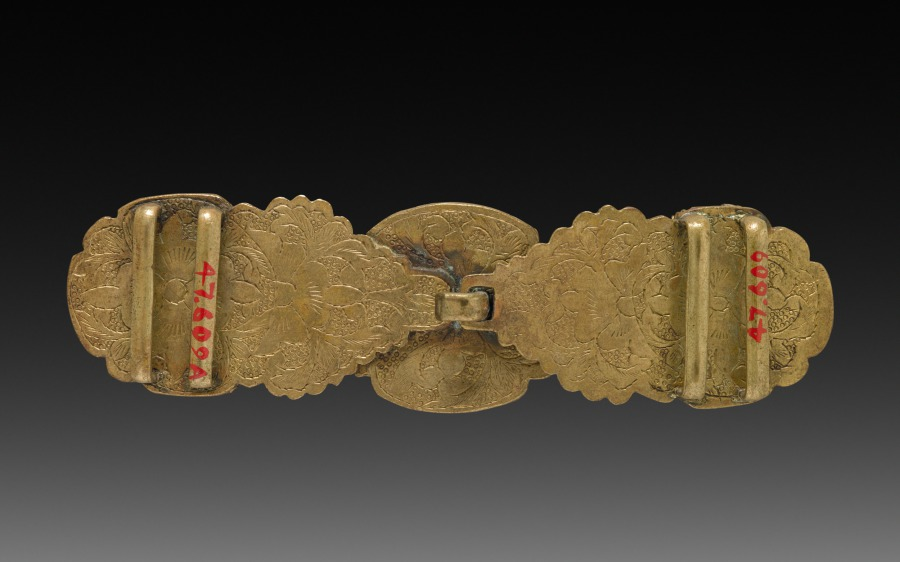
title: Buckle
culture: China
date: 1900s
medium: matrix and crystal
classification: Jewelry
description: Belts with buckles made of precious material were accessories for men of higher social status.